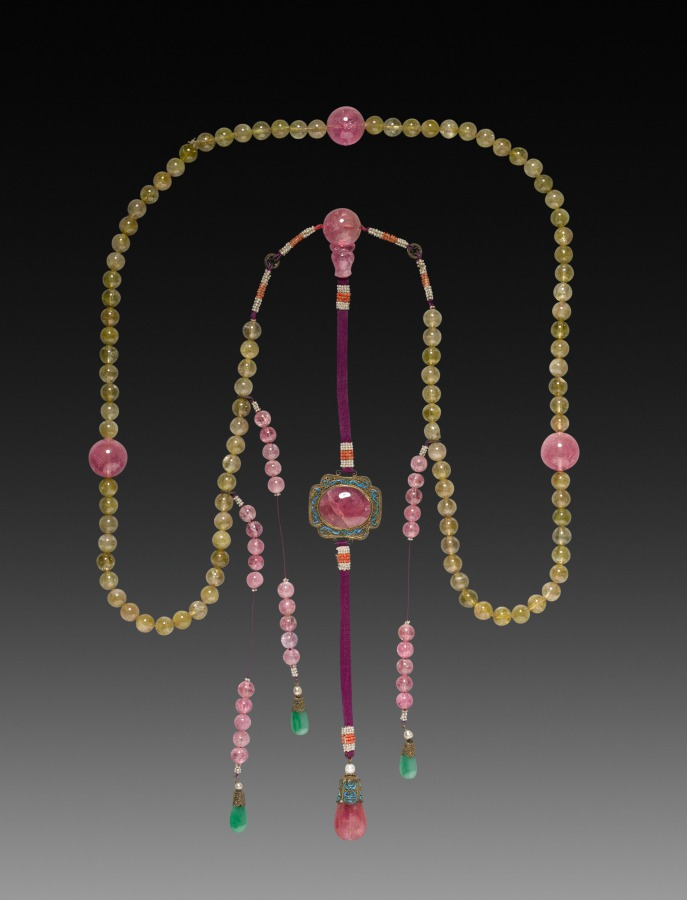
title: Mandarin Chain Bead Necklace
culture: China, Qing dynasty (1644-1911)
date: 1800s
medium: tourmaline, jade, pearls, seed pearls, seed coral and gilt metal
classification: Jewelry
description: Bead necklaces were worn by both high-ranking women and men, with a central string running over the person’s back and two side strings falling parallel to the necklace over the chest.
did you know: The gilt metal was decorated with blue kingfisher feathers.